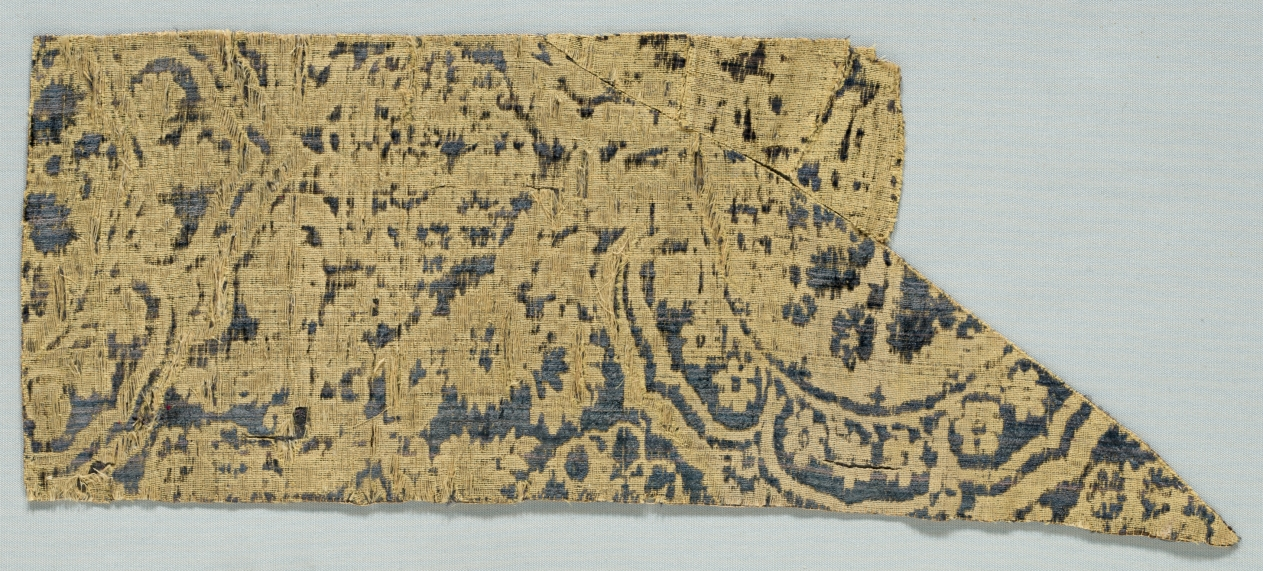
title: Velvet Fragment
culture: Italy, 15th century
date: 1400s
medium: velvet (cut and uncut); silk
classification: Velvet